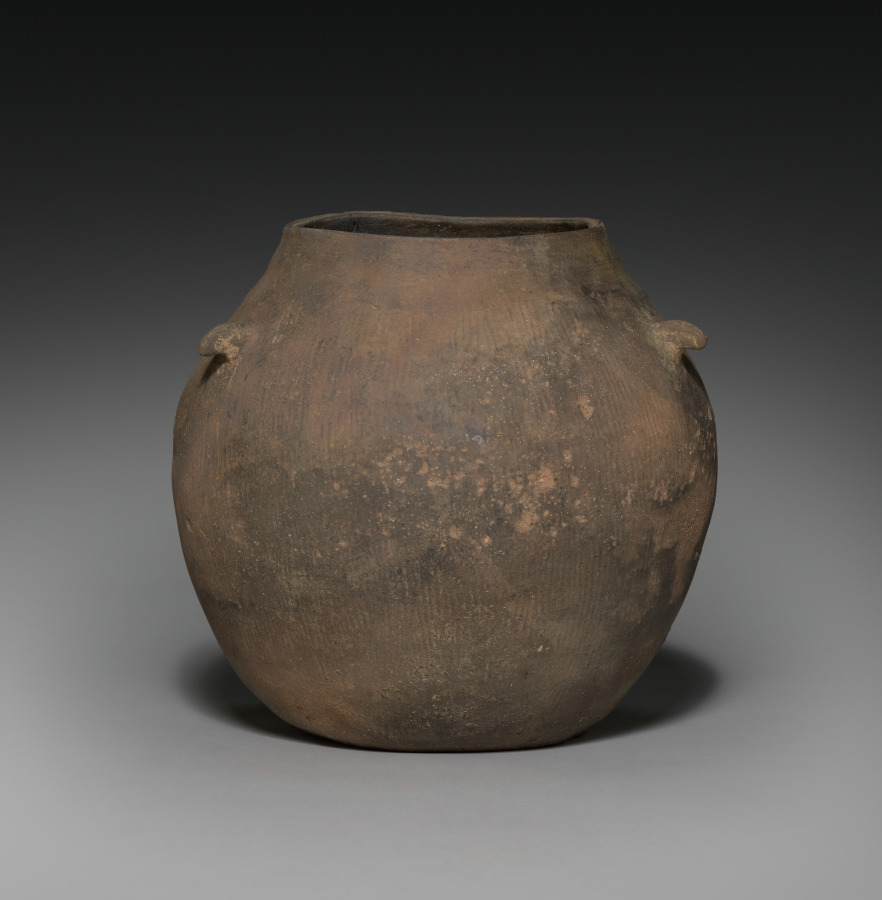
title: Lidded Jar with Four Horn Lugs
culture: Korea, Gaya period (42–562 CE)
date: 200s–400s CE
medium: earthenware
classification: Ceramic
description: Closed kilns built on hillsides became widely used for producing this type of pottery vessel in Korea during the Three Kingdoms period. Both its gray color and shimmering glaze are the result of the reduction of oxygen in the closed kiln chamber built on hillsides.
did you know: This pottery vessel served to contain cremated remains, indicating the popularity of Buddhist mortuary practice in Korea during the Three Kingdoms period.